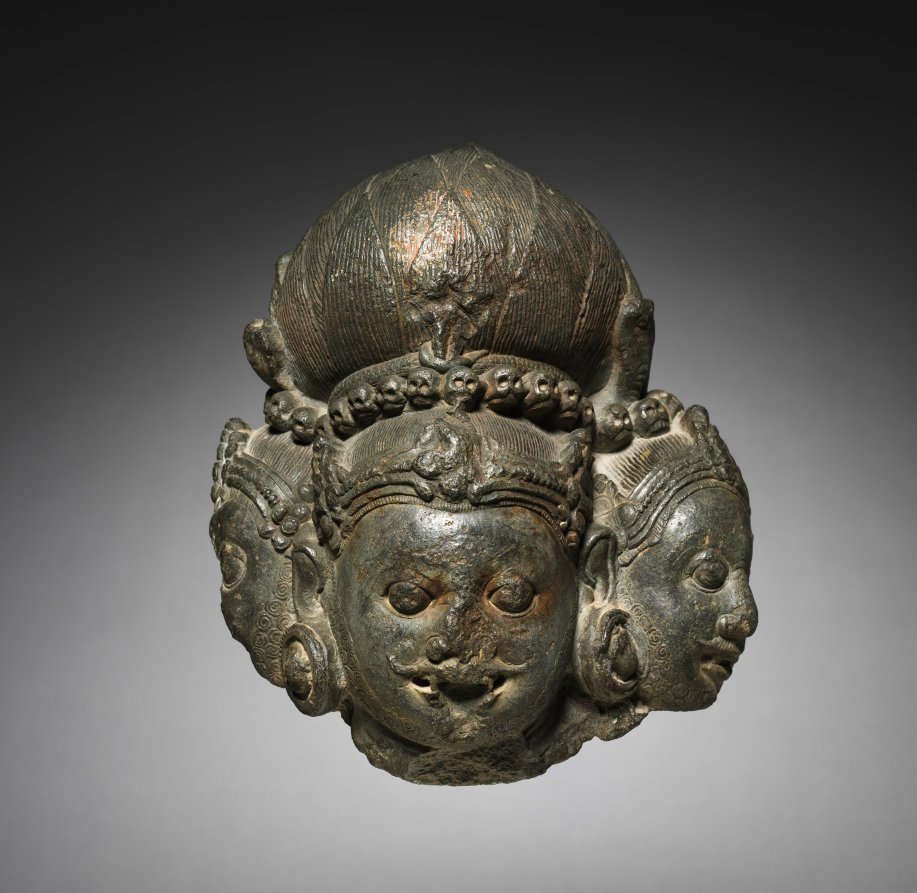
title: Trikala Bhairava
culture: Eastern India, Orissa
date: 1000s–1100s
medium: stone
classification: Sculpture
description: Bhairava is the name of the wrathful aspect of the Hindu god Shiva. His ferocity and fearsome attributes include the crown of skulls and cobras, bulging eyes, fangs, and hair that stands on end. His three heads are indicative of the passing of time from past through present to the future, which is the meaning of his epithet Trikala, or "triple time." The ferocity of this figure reminds devotees not to waste a moment in striving to reach liberation from the relentless passage of time that ultimately leads to death and destruction. In the Hindu tradition, liberation can be achieved through devotion to god, which may attract his merciful decision to bring the devotee to eternal blissful union with him.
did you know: His earlobes stretch around the circumference of large earrings.